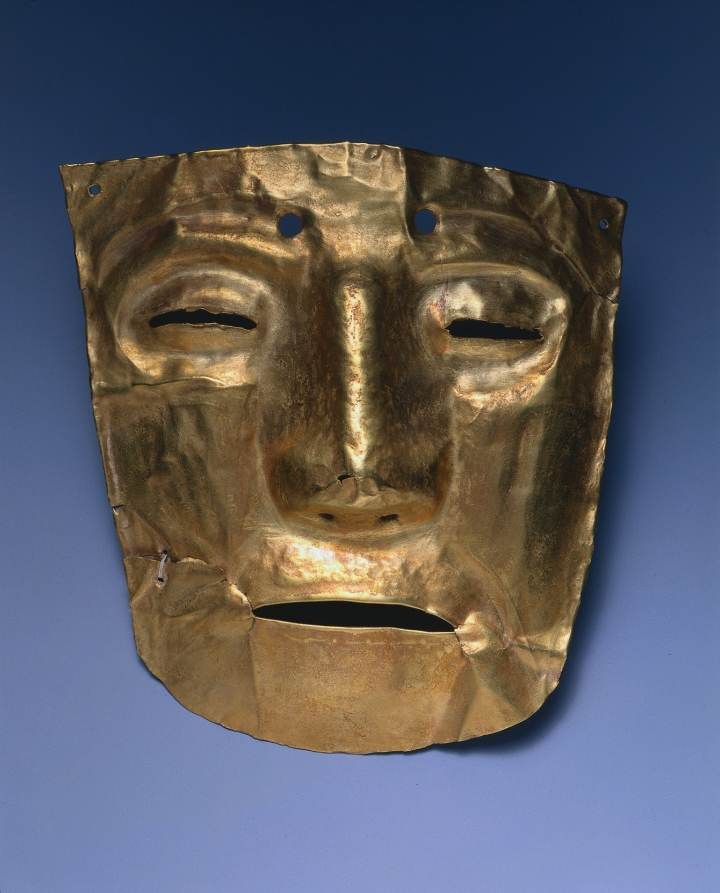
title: Mask Ornament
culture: Southern Costa Rica, (Rio Grande de Térraba, Diquís Region), Diquís Style, 8th-16th Century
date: c. 700–1550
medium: hammered and cut gold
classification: Metalwork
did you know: Panning for gold was viewed as a sacred activity among the ancient inhabitants of Costa Rica and Panama.